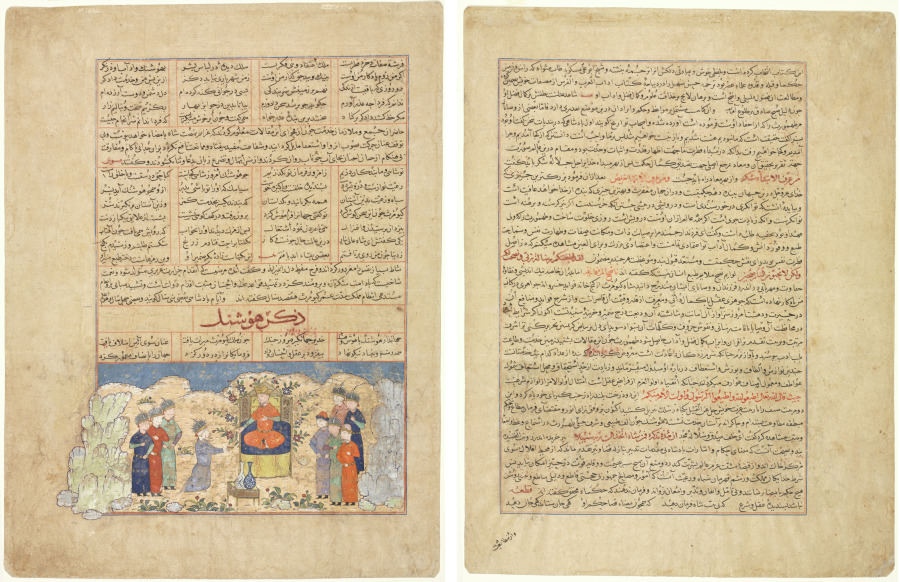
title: The Story of Hushang (recto), Illustration and text (Persian Prose) from Majmac al-Tavarikh (A Compendium of Histories) of Hafiz-i Abru; Text Page, Persian Prose, (verso), from Majmac al-Tavarikh (A Compendium of Histories) of Hafiz-i Abru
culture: Afghanistan, Herat, Timurid period (1370–1501)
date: early 1400s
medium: ink and opaque watercolor on paper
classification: Manuscript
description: These two pages are from a manuscript that evidently was written and illustrated for the library (at Herat) of the Timurid king Shah Rukh, the son of Timur (Tamerlane). The Majma' al-Tawarikh traced the history of the world, beginning with the prophets of the Old Testament until the reign of Shah Rukh.